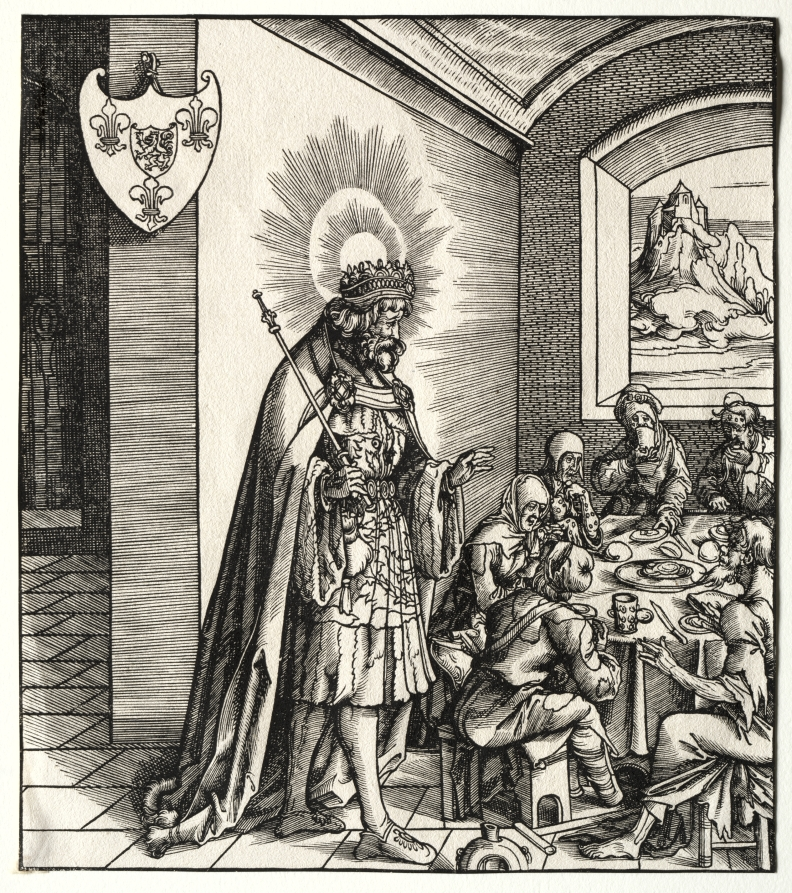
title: Saints Connected with the House of Habsburg: A General Account of the Ancestry of Emperor Maximilian I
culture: Germany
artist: Leonhard Beck (German, c. 1480–1542)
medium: woodcut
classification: Print